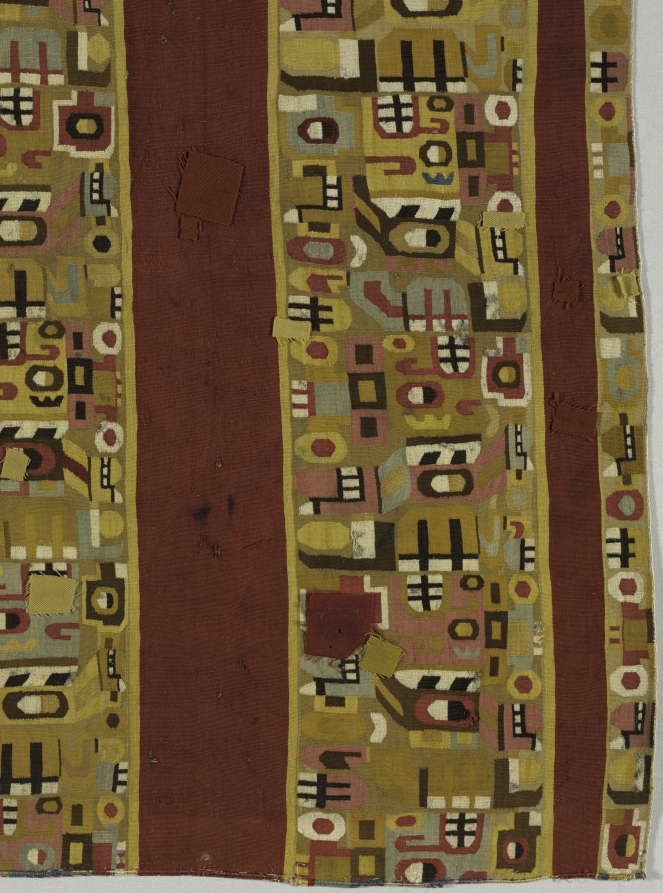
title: Tunic with Sacrificer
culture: South America, Peru, Central Andes, Middle Horizon, Wari people, 7th-11th century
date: 600–1000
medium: camelid-fiber, cotton; tapestry weave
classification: Textile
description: An extremely abstract supernatural sacrifice repeats in different colors and orientations across the body of this tunic, which was shortened on one side in antiquity. Look for the toothy black-and-white mouth in the sacrificer's upward-gazing head; other facial features include a button nose and a vertically divided eye. The figure holds the L-shaped haft of an axe behind its back and, at the front of its body, a short staff with a severed, upside-down human head on the top.